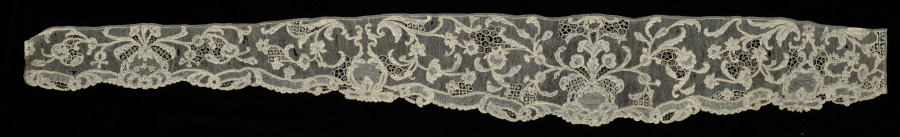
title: Lace Collar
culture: Italy, Burano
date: 1700–1740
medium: Linen: needle lace (Burano Point)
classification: Lace